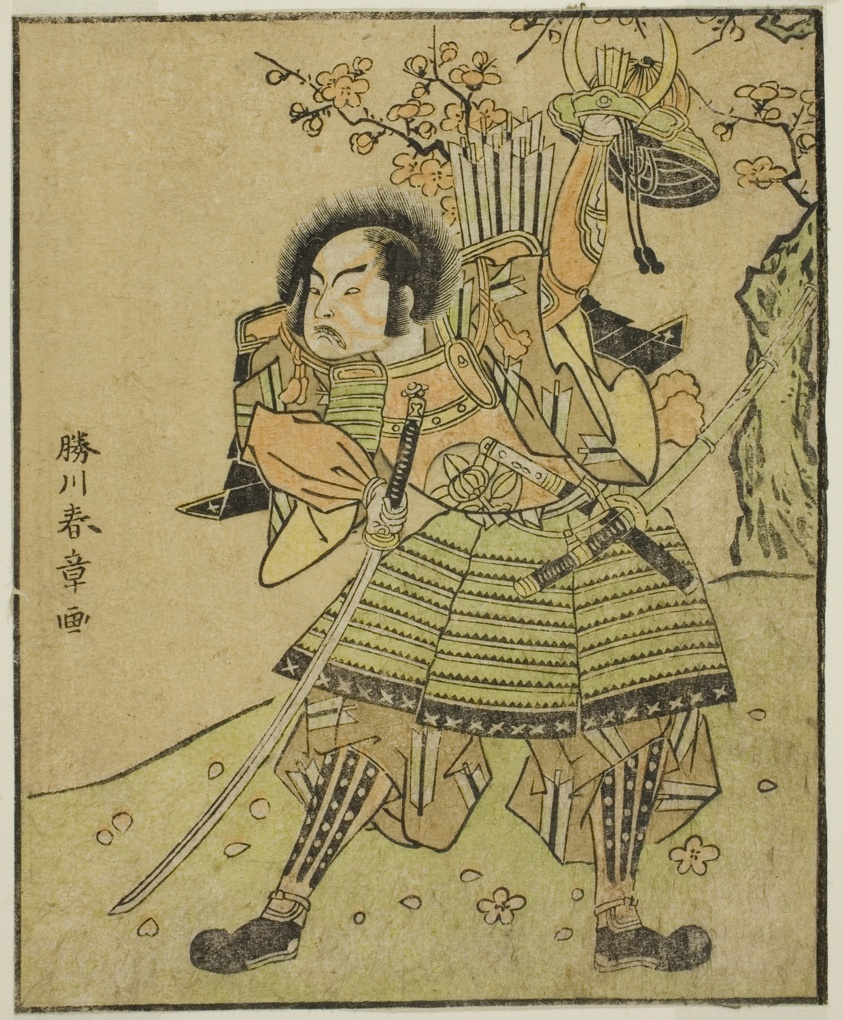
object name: Print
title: The Actor Ichimura Uzaemon IX as Kajiwara Genta no Kagetoki (?), in the Play Myoto-giku Izu no Kisewata, Performed at the Nakamura Theater in the Eleventh Month, 1770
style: Japanese (culture or style)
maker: Katsukawa Shunsho 勝川 春章; Japanese, 1726-1792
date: c. 1772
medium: Color woodblock print; from the illustrated book Yakusha Kuni no Hana (Prominent Actors of Japan)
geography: Japan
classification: woodblock print; print; asian art